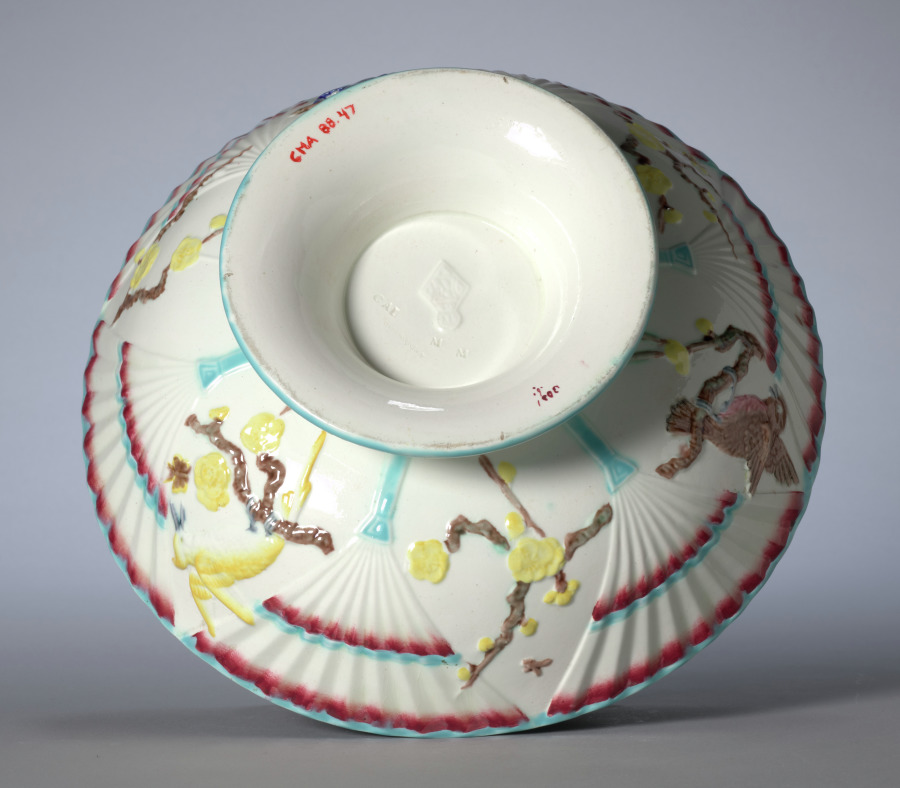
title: Bowl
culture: England, Staffordshire, 19th century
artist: Wedgwood Factory (British)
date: c. 1880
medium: earthenware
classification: Ceramic